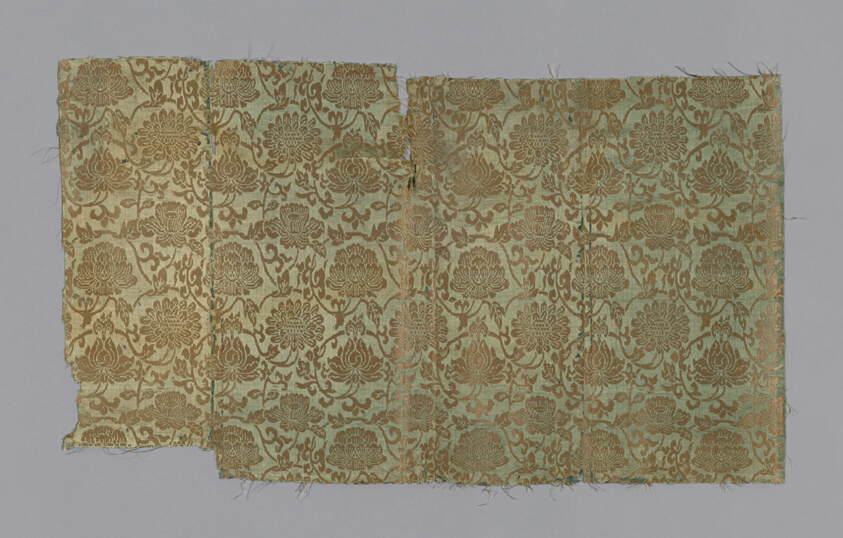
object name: Textile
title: Fragment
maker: Japan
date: late Edo period (1789–1868)/ Meiji period (1868–1912), 18th century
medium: Plain compound satin, silk.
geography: Japan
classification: textile; weaving